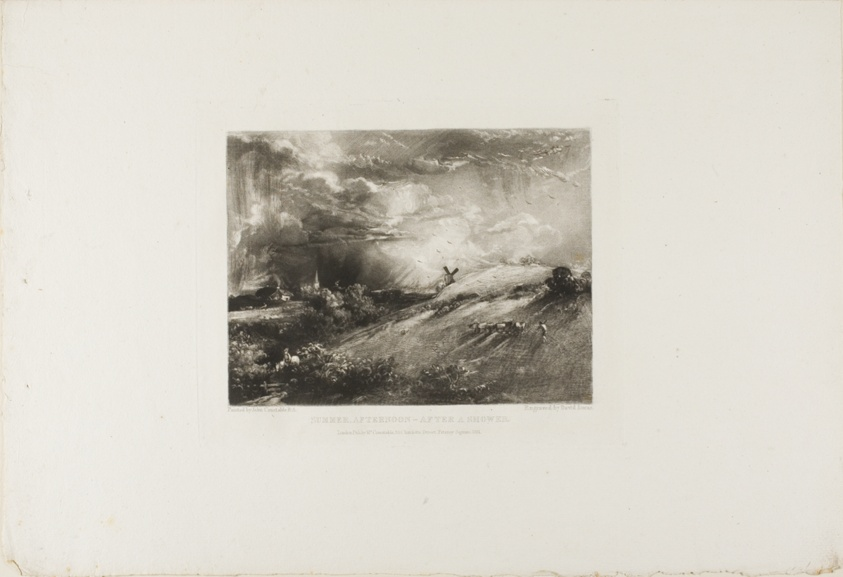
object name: Print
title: Summer Afternoon, after a Shower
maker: David Lucas (English, 1802-1881); after John Constable (English, 1776-1837)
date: published October 1831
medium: Mezzotint in black on ivory wove paper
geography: England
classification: mezzotint; print; prints and drawing